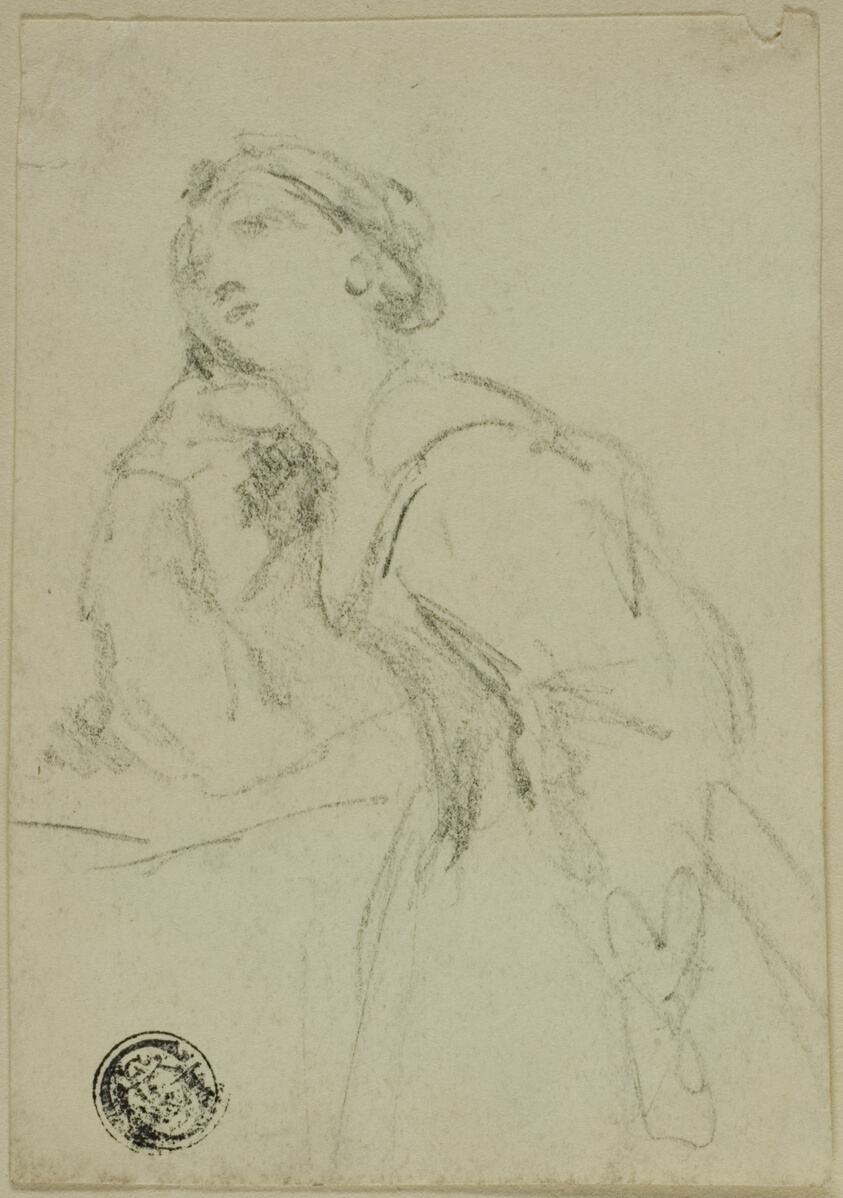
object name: Drawing and Watercolor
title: Three-Quarter Length Sketch of Woman in Evening Dress Leaning Head on Right Hand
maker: Unknown Artist; European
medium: Graphite on cream wove paper, tipped onto cream wove paper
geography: England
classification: graphite; drawings (visual works); prints and drawing